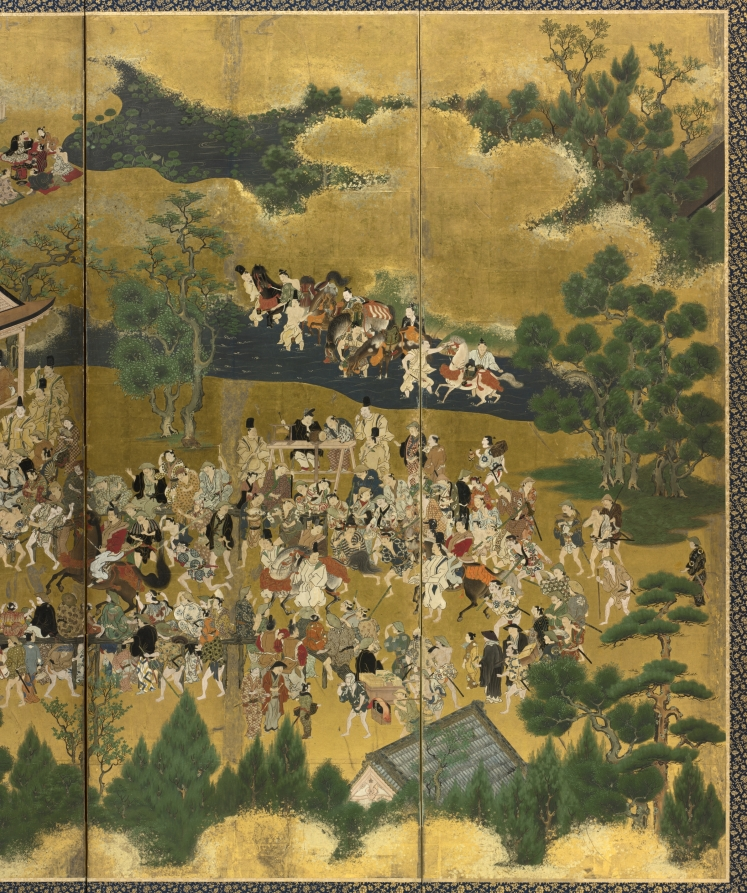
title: Horse Race at the Kamo Shrine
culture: Japan, Edo period (1615–1868)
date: early to mid-1600s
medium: One of a pair of six-panel folding screens; ink and color on gilded paper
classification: Painting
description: Kamo Shrine in Kyoto, seen in the upper half of the left screen, has held an annual horse race on May 5th since the ninth century. Serving as a snapshot of the festivities, this pair of screens captures nearly 600 people watching the race, beginning at the bottom part of the right screen and continuing to the left. The race is a great spectacle where aristocratic riders cling to their fast and unwieldy mounts. While many of those in attendance seem in rapt attention to the main event, other vignettes depict people engaged in an array of activities. This pair of screens was likely originally part of a group of linked murals.